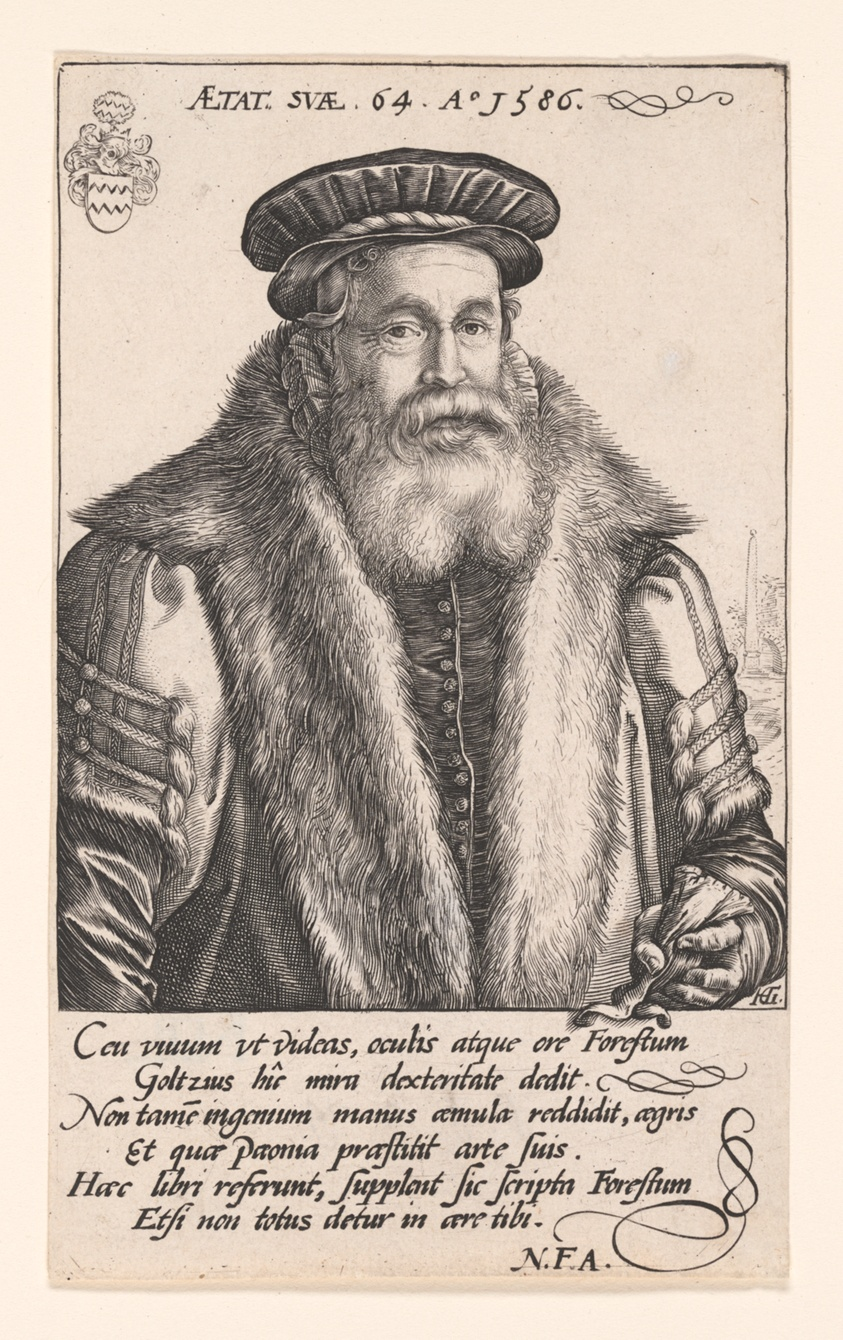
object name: Print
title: Pieter van Foreest (Petrus Forestus)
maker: Hendrick Goltzius (Dutch, 1558–1617)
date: 1586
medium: Engraving on paper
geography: Netherlands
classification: engraving; paper; print; prints and drawing